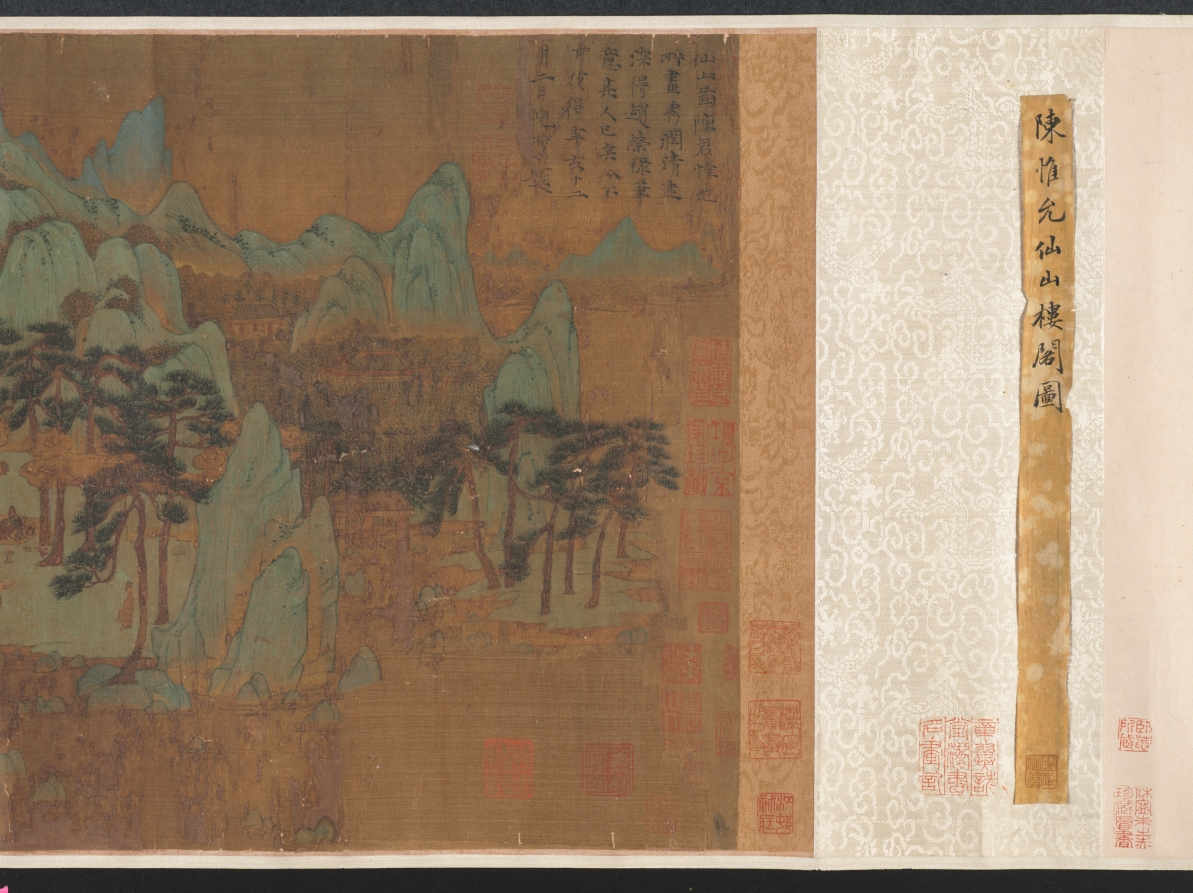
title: Mountains of the Immortals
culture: China, Yuan dynasty (1271-1368)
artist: Chen Ruyan (Chinese, c. 1331–1371)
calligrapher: Ni Zan (Chinese, 1301–1374)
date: 1300–1370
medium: Handscroll; ink and color on silk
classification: Painting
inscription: 1 inscription, 3 colophons, and 37 seals: 1 inscription, dated 1371, by Ni Zan 倪瓚 (1301-1374); 17 seals of Xiang Yuanbian 項元汴 (1525-1590); 4 seals of Chu Chih-ch'ih (late Ming Dynasty); 1 seal of Liang Qingbiao 梁淸標 (1620-1691); 1 seal of Gao Shiqi 高士奇 (1645-1704); 4 seals of Lu Xinyuan 陸心源 (1834-1894); 1 colophon, dated 1908, and 5 seals of Jing Xian 景贒; 1 colophon, dated 1915, by Lung Yu; 1 colophon, dated 1932, and 2 seals of Wu Mei; 3 seals unidentified.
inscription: 仙山圖， 陳君惟允所畫。 秀潤清遠， 深得趙榮祿筆意。 其人已矣， 今不可復得。 辛亥十二月二日倪瓚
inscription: Colophon by Jing Xian 景贒: The preceding Land of Immortals is an authentic work of the Yuan master, Chen Weiyun 陳惟允. According to the Yu yi bian 寓意編 by Du Mu 都穆of the Ming Dynasty, the painting was seen at the home of Chen Mengxian 陳孟賢 [c. 1500], a hermit. It is also recorded in Yu yi lu 寓意錄 of the present [Qing] era. The dimensions and the seals are all correct. When the painting went into the possession of Liang Qingbiao 梁淸標, the silk was already quite dilapidated. The only thing now missing, however, is the one line of writing by Xiang Zijing 項子京 [Xiang Yuanbian 項元汴] who records the original price he paid, being fifteen taels of silver. This must have been cut off by the dealer, which nevertheless did no harm to a masterpiece such as this. Jing Xian recorded this in the second month of the maoshen year [1908].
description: The landscape in deep green tones offers a view into a secluded mountain valley, populated by ancient figures surrounded by deer and cranes, all under high pine trees. A red-robed immortal in the air steers his crane toward the paradise land. This idyllic scene was presumably created amid the tumultuous transition from the Yuan to the Ming dynasty. Chen from Suzhou supported major rebel leaders, first Zhang Shicheng (1321–1367) with his base in Suzhou and then his rival Zhu Yuanzhang in Nanjing, after the latter had established the Ming dynasty. Chen was executed in 1371.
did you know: Such blue and green landscapes often evoke nostalgia for the idealized ancient times.